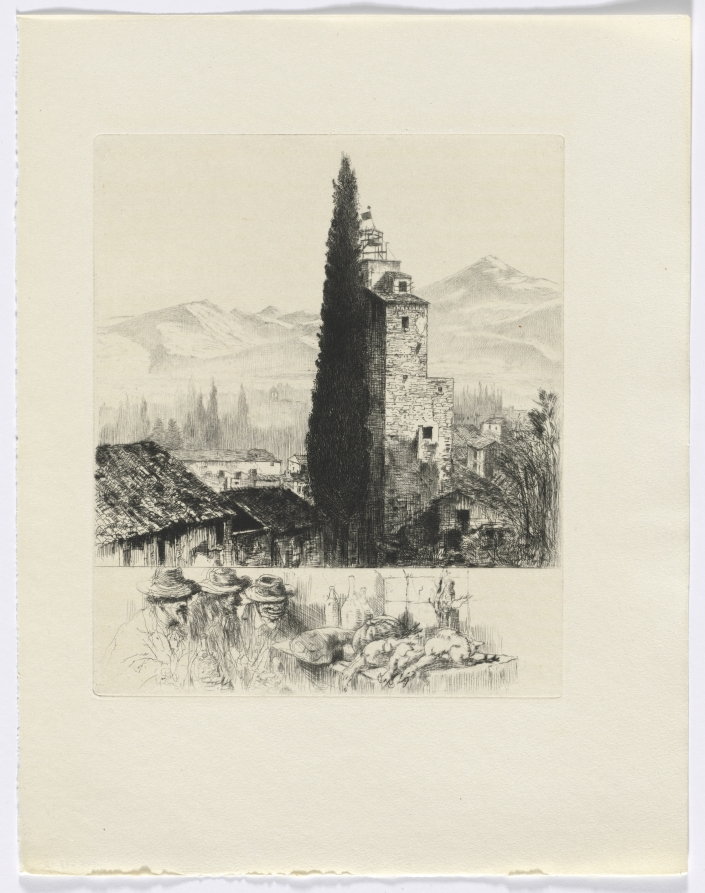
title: Frédéric Mistral: Mémoires et Recits by Frédéric Mistral: tower in landscape/ man and dead game (insert after p. 200)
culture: France, 20th century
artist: Auguste Brouet (French, 1872–1941)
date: 1937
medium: etchings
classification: Portfolio